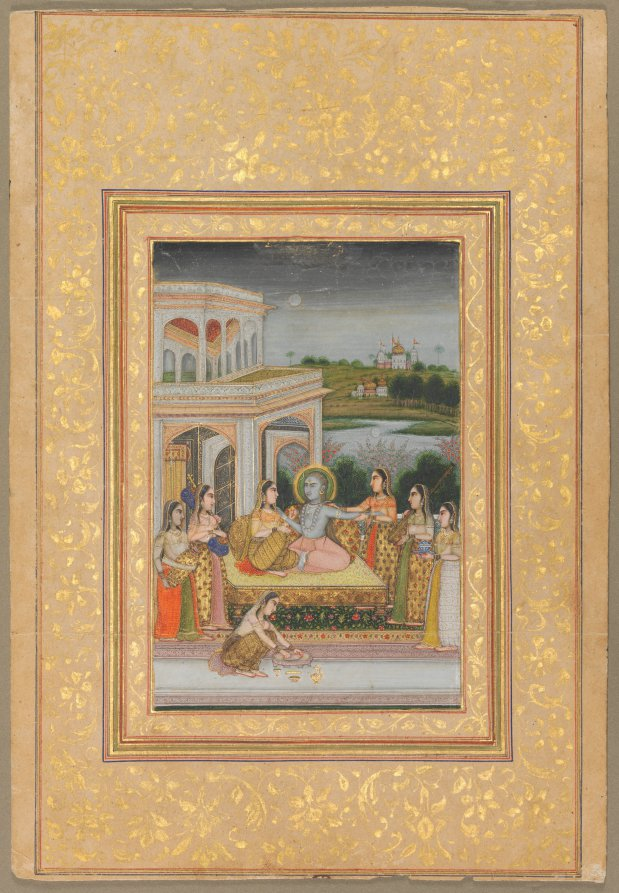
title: Bhairava Raga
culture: India, early 19th century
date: early 1800s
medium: Gum tempera and gold on paper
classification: Painting